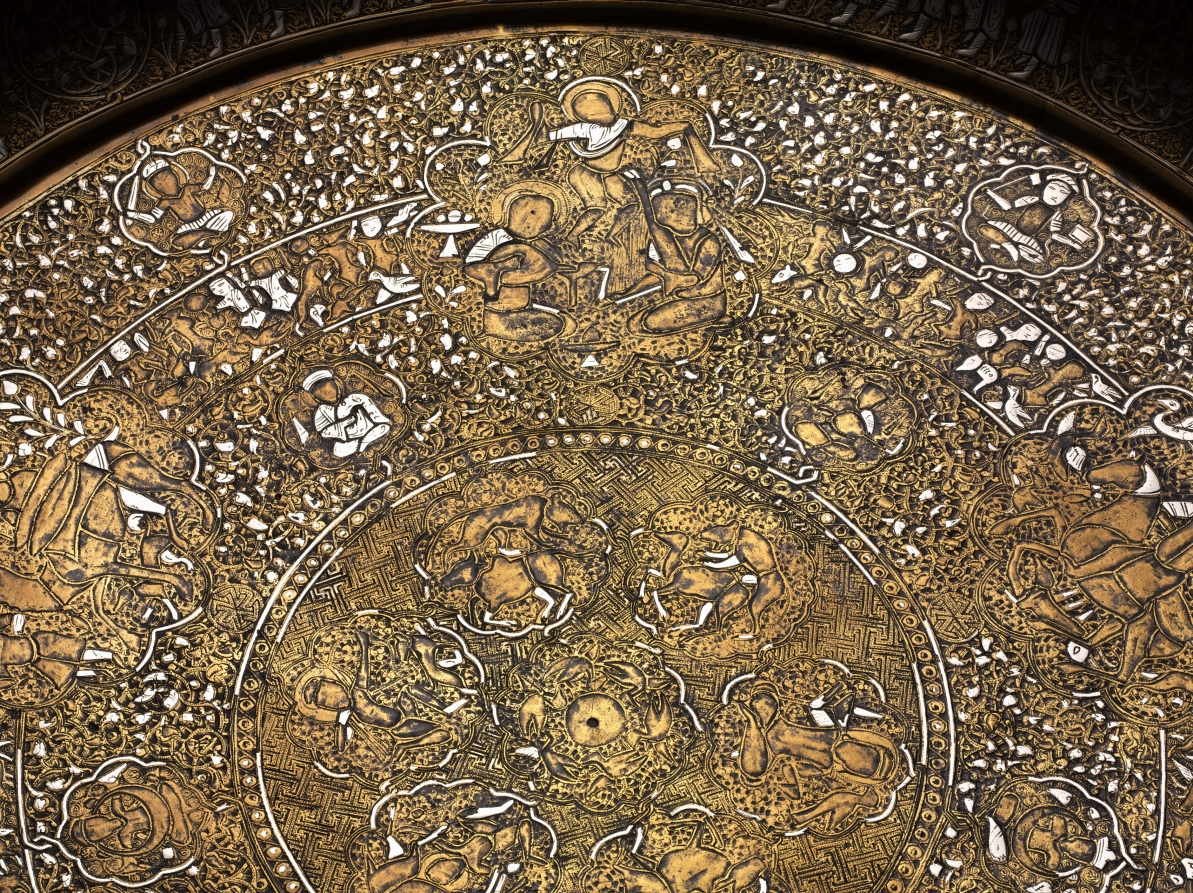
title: Tray Portraying Courtly Pleasures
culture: Syria, Ayyubid period (1171–1260)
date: 1240s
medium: sheet brass inlaid with silver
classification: Metalwork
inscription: The presence of ligatures in the narrow circular bands with interconnected human and animal figures suggests this may be a degenerate form of animated script. It is indecipherable.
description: This tray features images of courtly life interspersed with astronomical symbols. The scenes contained within large multilobed medallions display an enthroned prince with lions at his feet, a banquet, a hunt, dancers, and musicians. Contained within the concentric circles there are also references to solar and lunar motifs, including figures holding sunbursts and lunar crescents. This tray is made of a single sheet of brass and the silver inlay, which is best preserved on the tray’s inner curve, suggests its original brilliance.